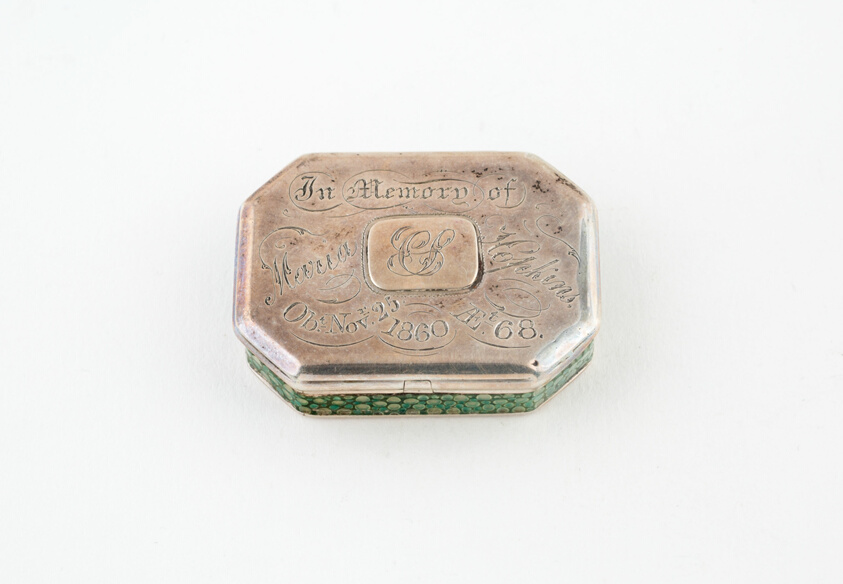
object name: Metalwork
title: Vinaigrette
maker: Possibly London, England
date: c. 1829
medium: Silver, silver gilt, and shagreen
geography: London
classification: vinaigrette (container for health care); container for personal use; box; european decorative arts; metalwork; silver; decorative object/ornament